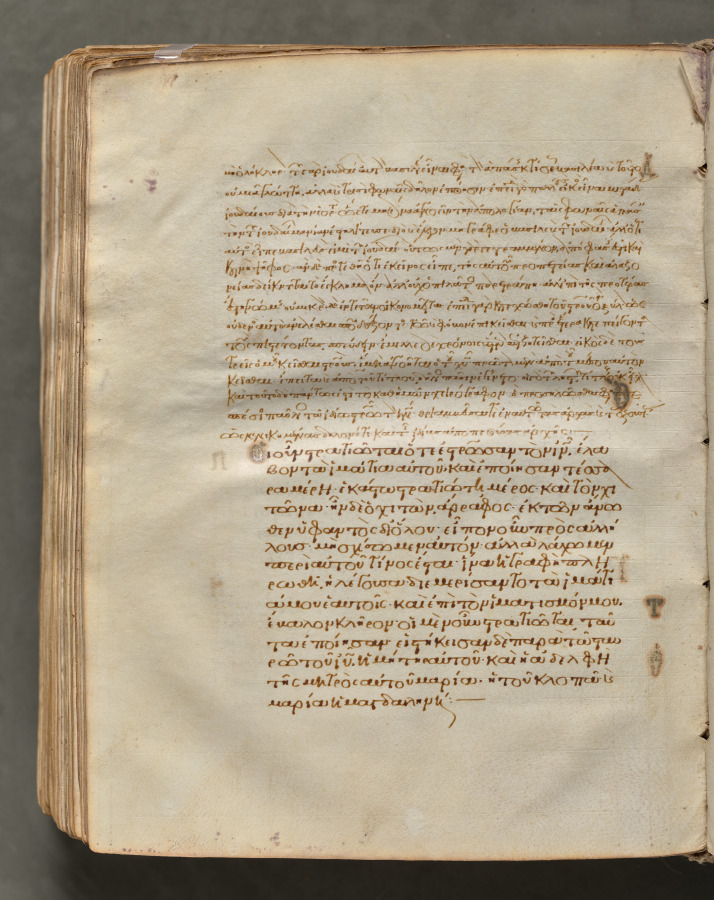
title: Text, folio 414 (verso), from a Gospel Book with Commentaries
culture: Byzantium, Constantinople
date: c. 1000–1100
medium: ink, tempera, and gold on vellum; leather binding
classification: Bound Volume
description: Each of the four gospels in this book opens on a page with brilliantly illuminated borders depicting the author of the text as well as birds—principally peacocks, symbols of the immortality of the soul—and fountains, representing the fountain of life and the salvation of the soul. This volume consists of 428 leaves with texts in Greek. Its level of sophistication suggests that it was probably written and decorated in a monastery in Constantinople.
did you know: Gospel books were carried in procession through Byzantine churches.